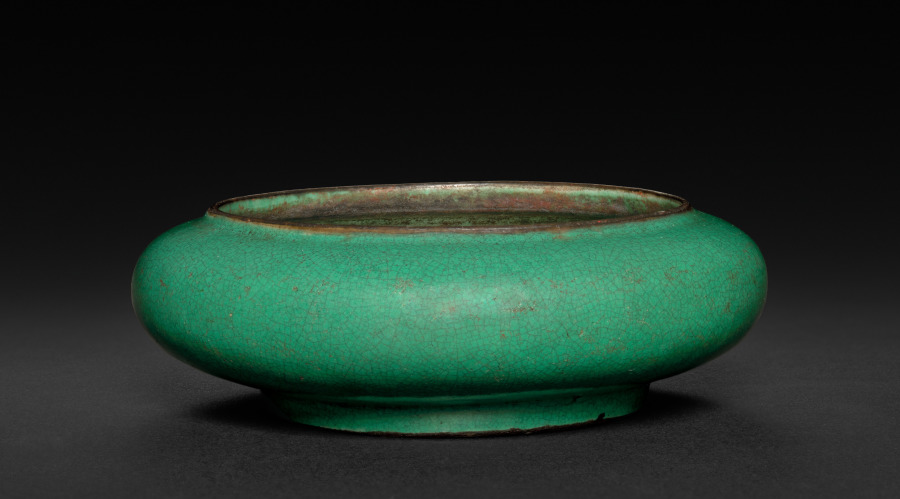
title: Flattened Globular Bowl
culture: China, Qing dynasty (1644-1911), Kangxi reign (1661-1722)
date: 1661–1722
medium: porcelain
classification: Ceramic